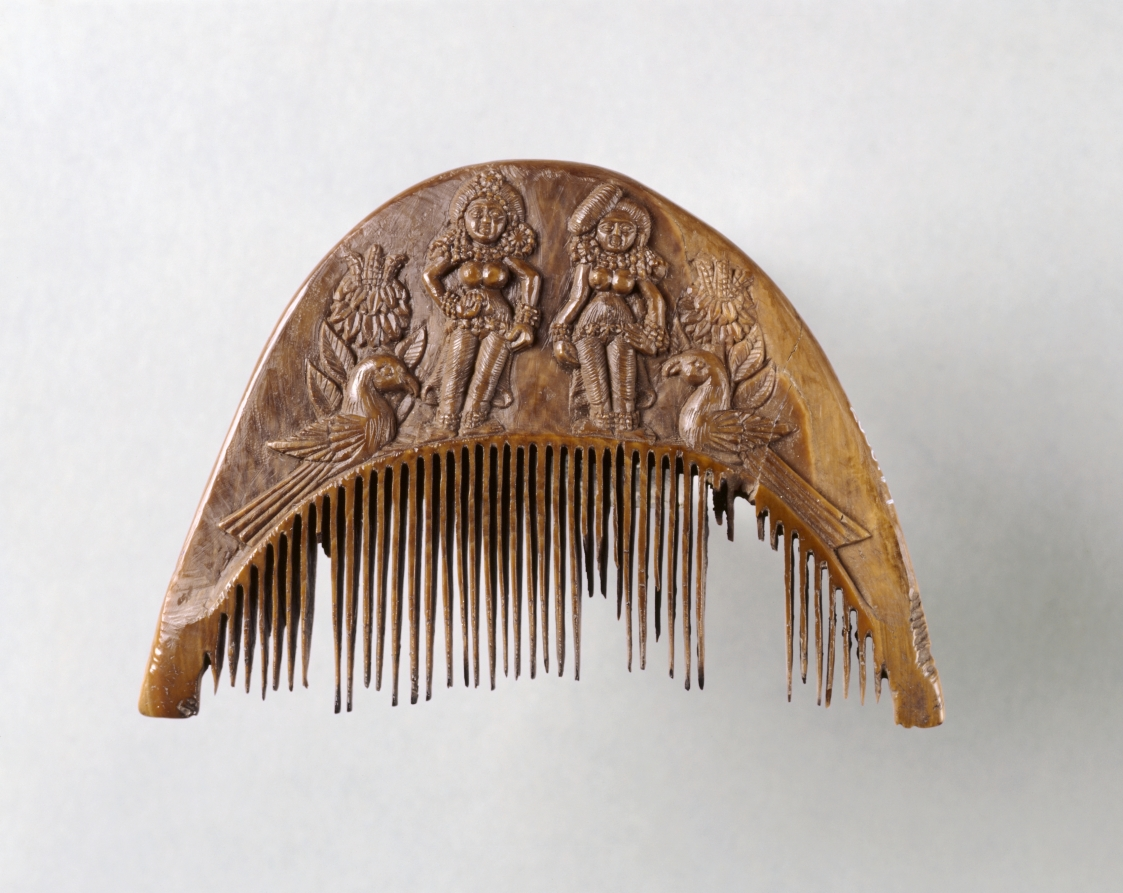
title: Comb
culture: India, Bengal, Chandraketugarh area, Shunga period (185–78 BCE)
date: 200 BCE–100 CE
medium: ivory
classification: Ivory